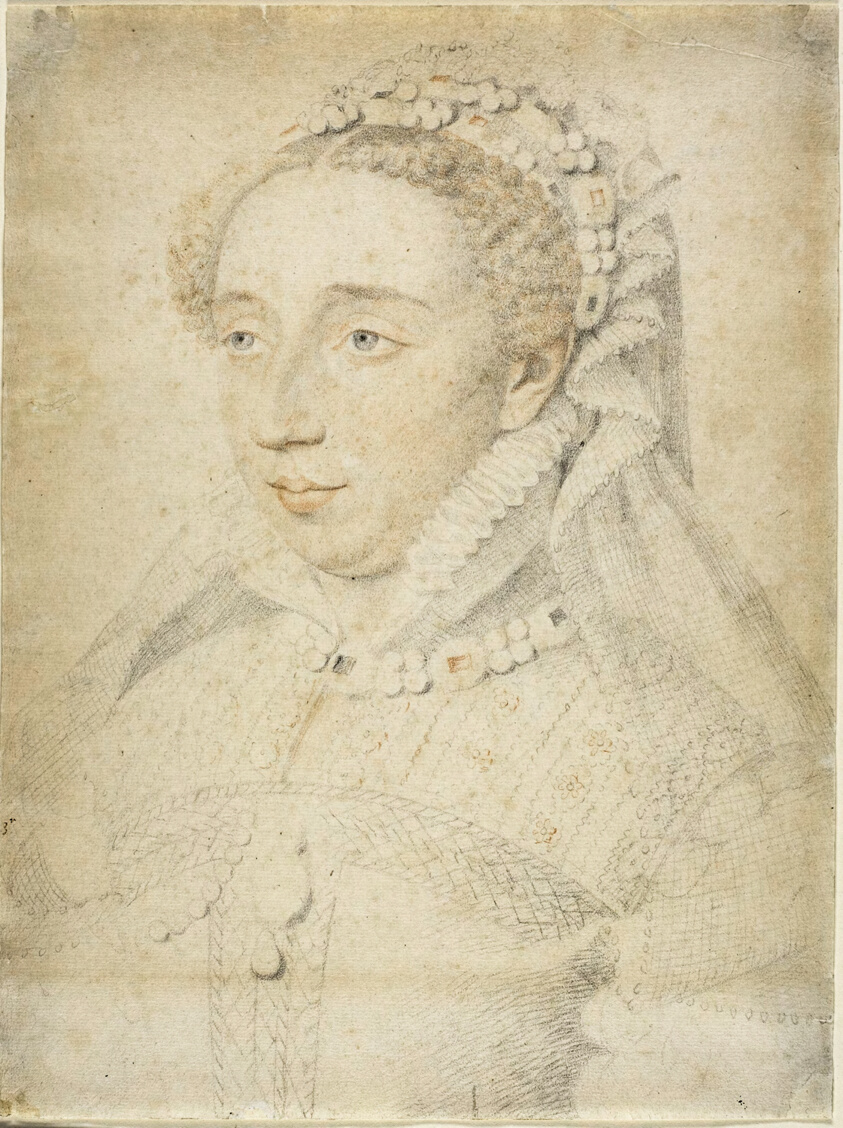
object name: Drawing and Watercolor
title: A Court Lady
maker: Circle of Francois Clouet (French, c. 1510-1572); Style of Daniel Dumonstier (French, 1574-1646)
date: 1555/72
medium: Red and black chalk, on ivory laid paper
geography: France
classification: graphite; drawings (visual works); prints and drawing